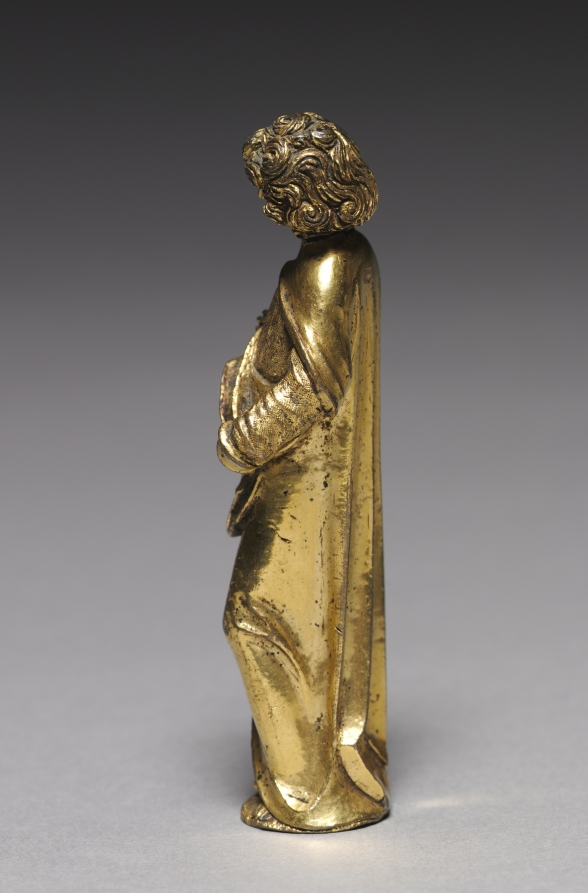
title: Mourning Saint John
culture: Germany, Franconia, late 15th century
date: late 1400s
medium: gilt bronze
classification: Sculpture